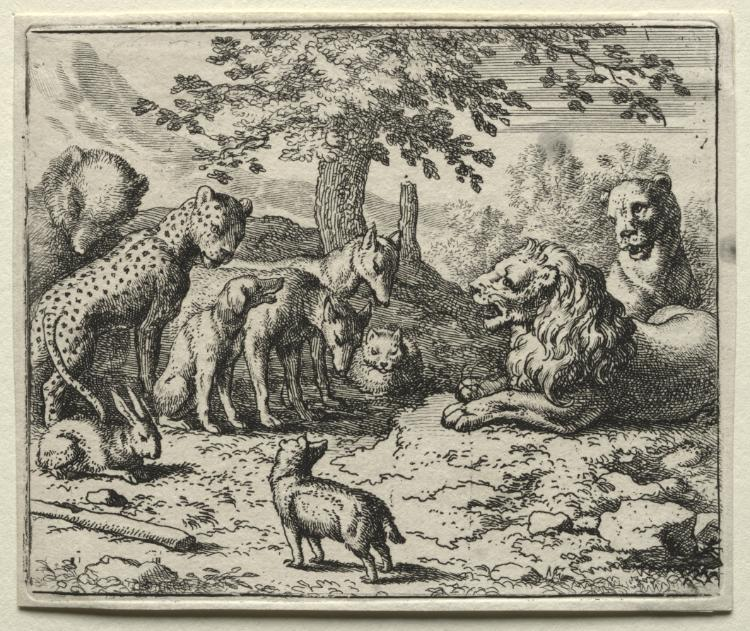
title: Reynard the Fox: The Lion's Council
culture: Netherlands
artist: Allart van Everdingen (Dutch, 1621–1675)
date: 1650–75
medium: etching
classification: Print